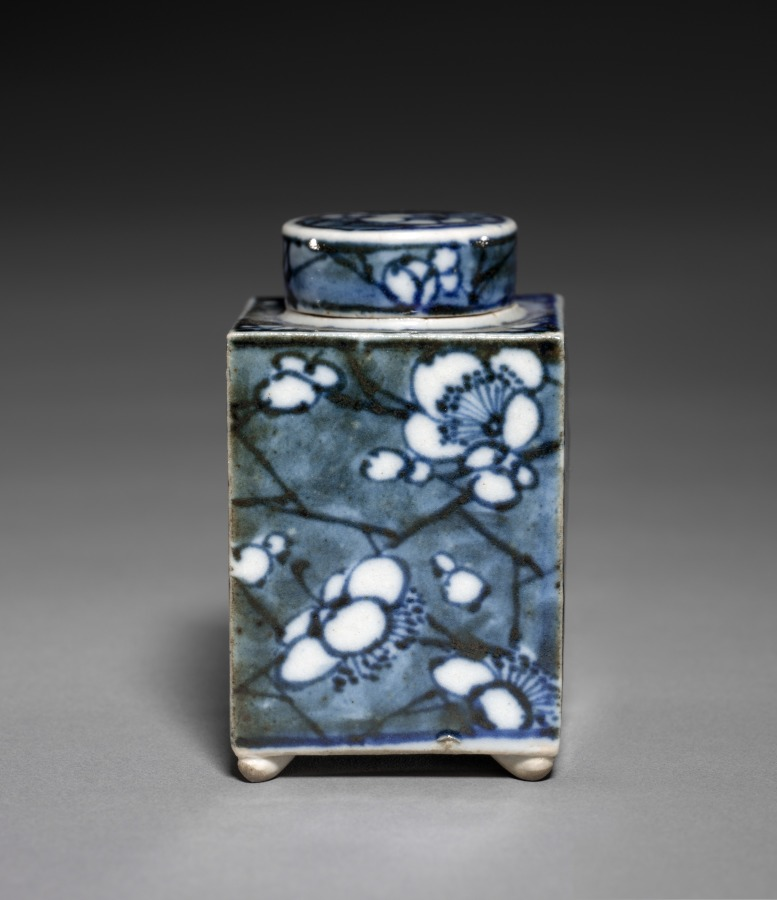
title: Tea Container with Plum Blossoms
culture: Japan, Edo period (1615–1868)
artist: Aoki Mokubei (Japanese, 1767–1833)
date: early 1800s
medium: porcelain with underglaze blue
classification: Ceramic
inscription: signed "Ro Mokubei" on base in underglaze blue.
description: Aoki Mokubei, born into a family of restaurateurs, was a potter, calligrapher, painter, and scholar, and is considered one of the three masters of later Edo period Kyoto ceramics. He specialized in porcelains fashioned after Chinese prototypes, and created works for steeped tea (sencha) such as these matching tea caddies decorated in an underglaze blue called sometsuke—literally “with applied dye.” He signed them on their bottoms. They also have intricately patterned silk sleeves to both beautify and protect them. On the exterior of the lid of the outer wooden box that contains them, it is written that Mokubei inscribed and painted an image on the box. On the interior of the lid, the signature and seals of a former owner are written. Mokubei has signed the lid of the inner box, and a charming ink and light color composition of West Lake in Hangzhou in China covers its three sides. On the fourth side is a long inscription by Mokubei describing the scene.